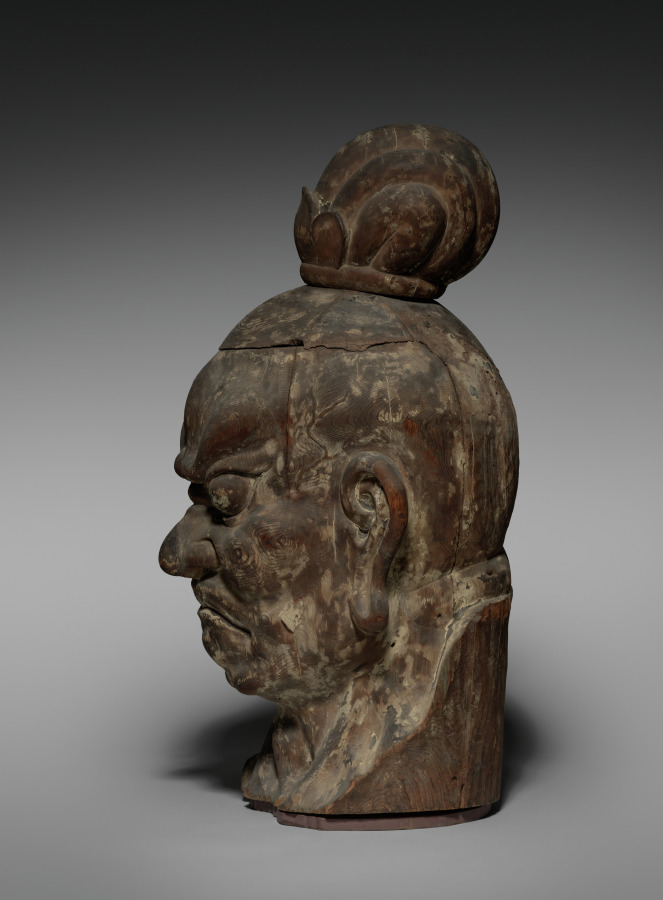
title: Head of Ni-o with Closed Mouth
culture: Japan, Kamakura period (1185–1333)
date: 1200s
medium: wood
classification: Sculpture